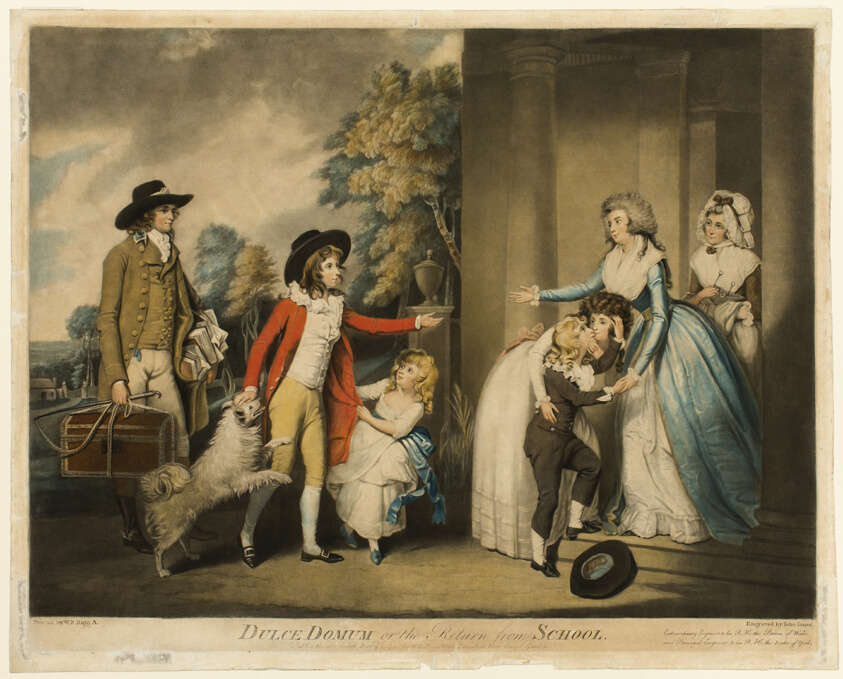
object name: Print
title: Dulce Domum, or the Return from School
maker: John Jones (English, 1745-1797); after William Redmore Bigg (English, 1755-1828)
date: published December 1, 1790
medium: Hand-colored mezzotint on ivory laid paper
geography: England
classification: mezzotint; print; prints and drawing